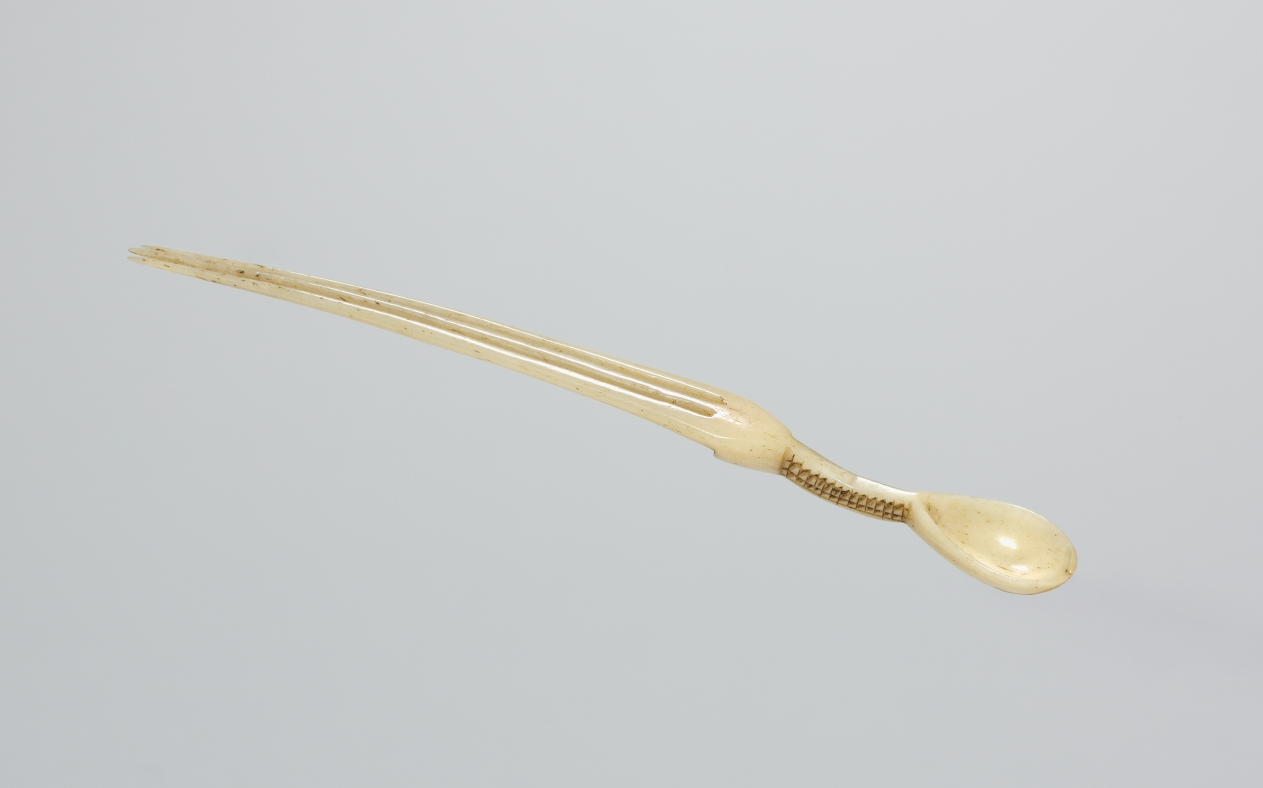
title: Snuff Spoon/Comb (intshengula or izintshengula)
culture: Africa, Southern Africa, South Africa, Zulu-style maker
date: late 1800s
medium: Bone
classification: Sculpture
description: Often, snuff spoons made from the rib of an ox or cow were subtly carved to suggest a female body. Decorated with incised designs blackened with cattle fat and ash, many are true hybrid objects, combining a spoon with a long-tined comb or hairpin. Such spoons were typically worn as ornaments in the hair or even the beard, thus signaling the social standing of their wearer.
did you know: Such spoons were typically worn as ornaments in the hair or even the beard, signaling the social standing of their wearer.